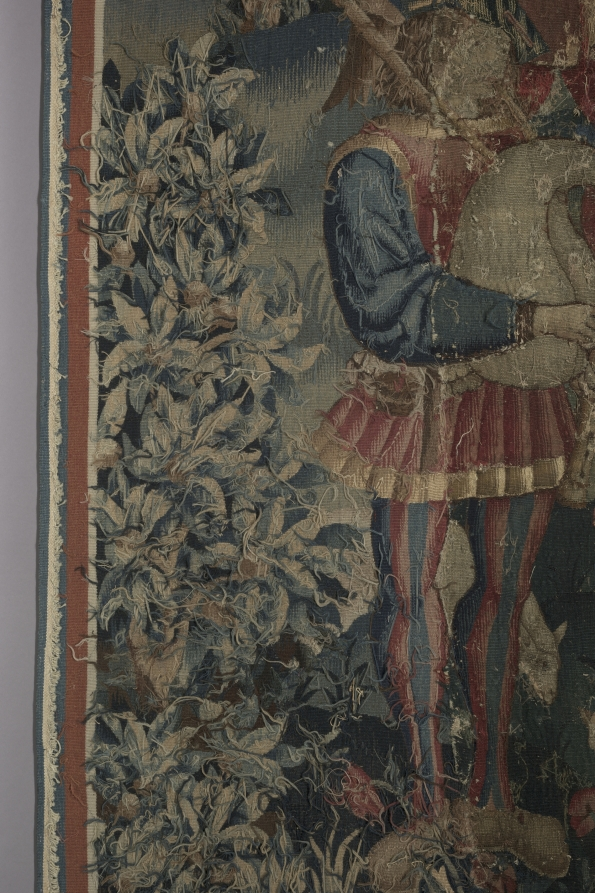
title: Shepherds in a Round Dance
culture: Netherlands, early 16th century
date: around 1500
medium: Wool and silk: tapestry weave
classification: Tapestry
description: Late medieval tapestries often use a limited yet contrasting color palette to portray stylized images. The expressions of these figures, for example, are conveyed more by their postures than by their faces. Four shepherds and shepherdesses join hands and dance to the music of a bagpiper at the far right, while a lord and two ladies on the left look on. A dog and sheep amid blossoming plants and trees contribute to the festive pastoral scene in front of a castle.